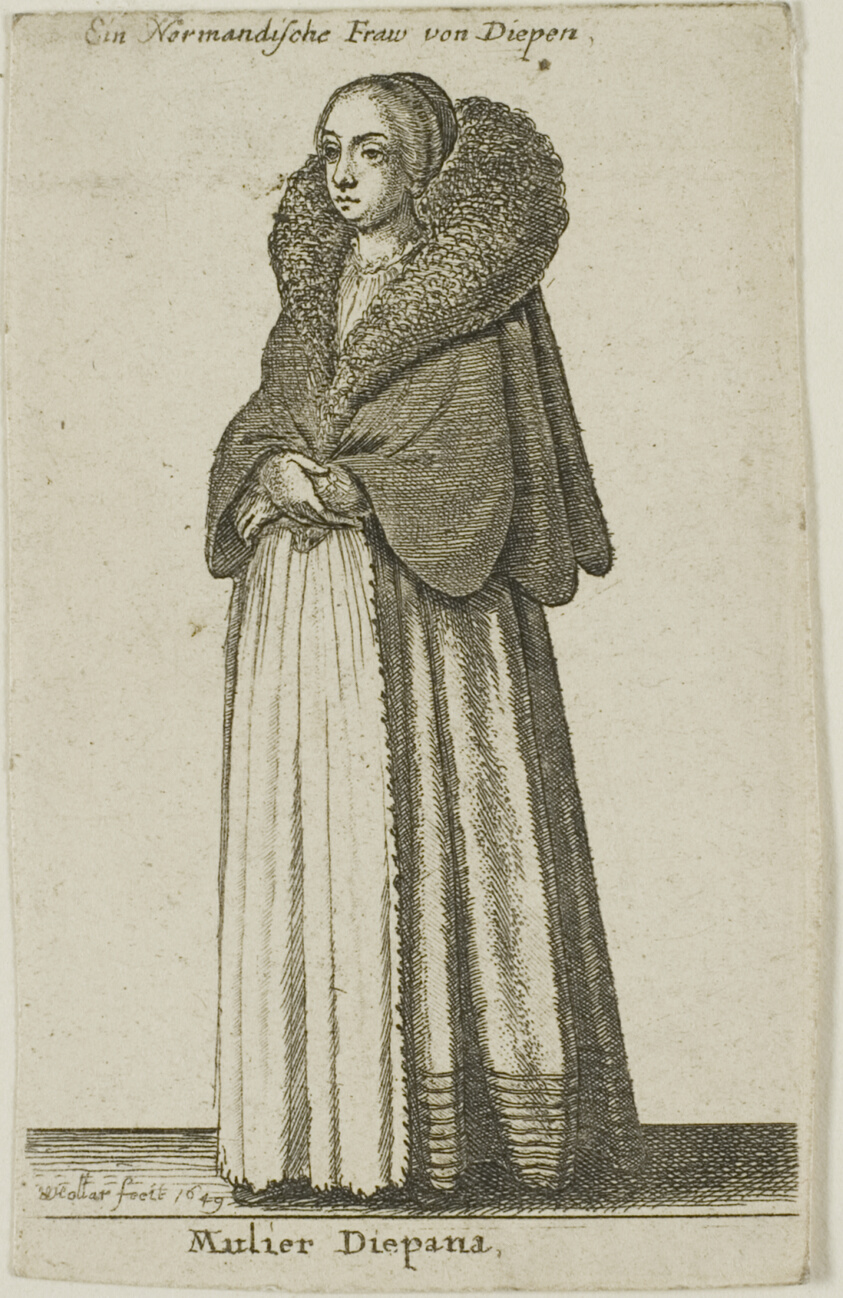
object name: Print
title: Dieppe Woman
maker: Wenceslaus Hollar (Bohemian, 1607-1677)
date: 1649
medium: Etching on ivory wove paper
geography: Bohemia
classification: etching; print; prints and drawing